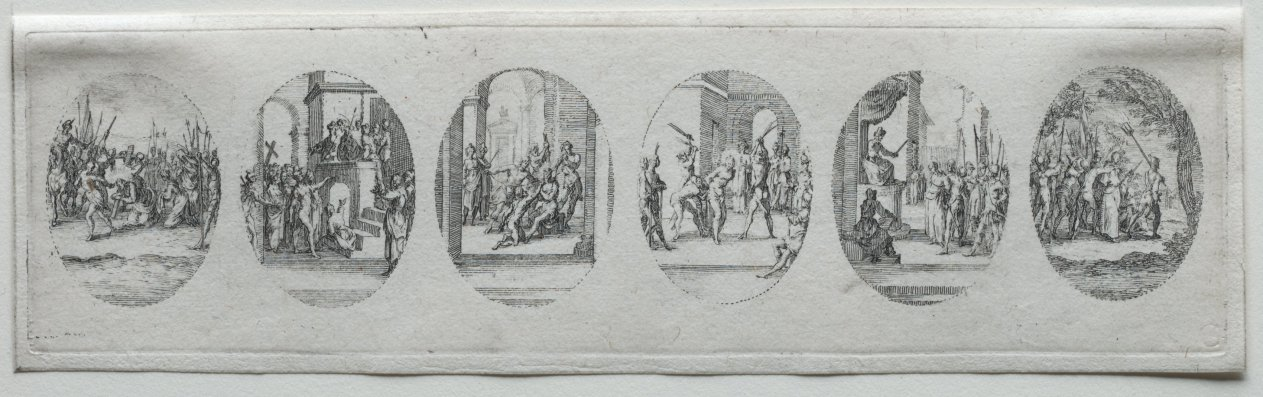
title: The Mysteries of the Passion: Christ Crowned with Thorns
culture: France, 17th century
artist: Jacques Callot (French, 1592–1635)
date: 1631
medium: etching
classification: Print